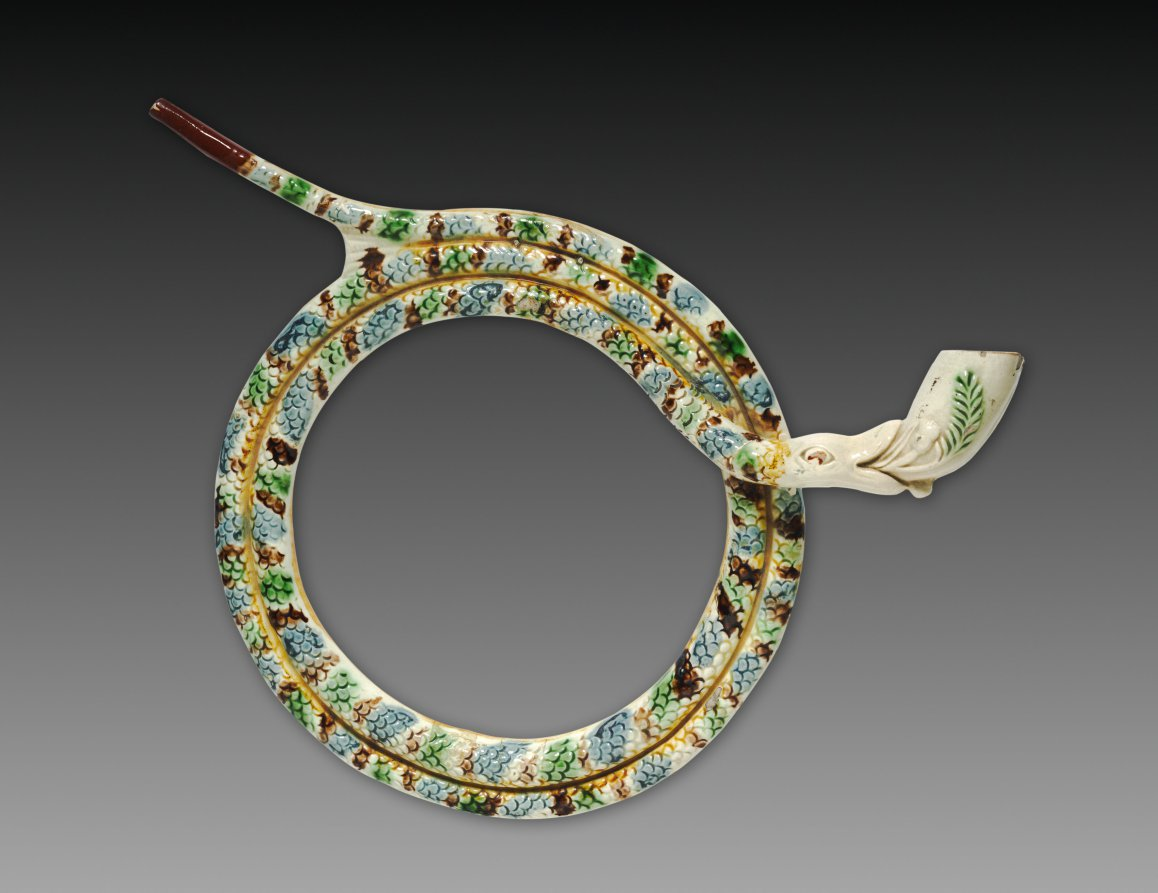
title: Pipe in the Form of Coiled Snake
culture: England, Staffordshire, late 18th-early 19th Century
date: 1780–1820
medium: lead-glazed earthenware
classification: Ceramic